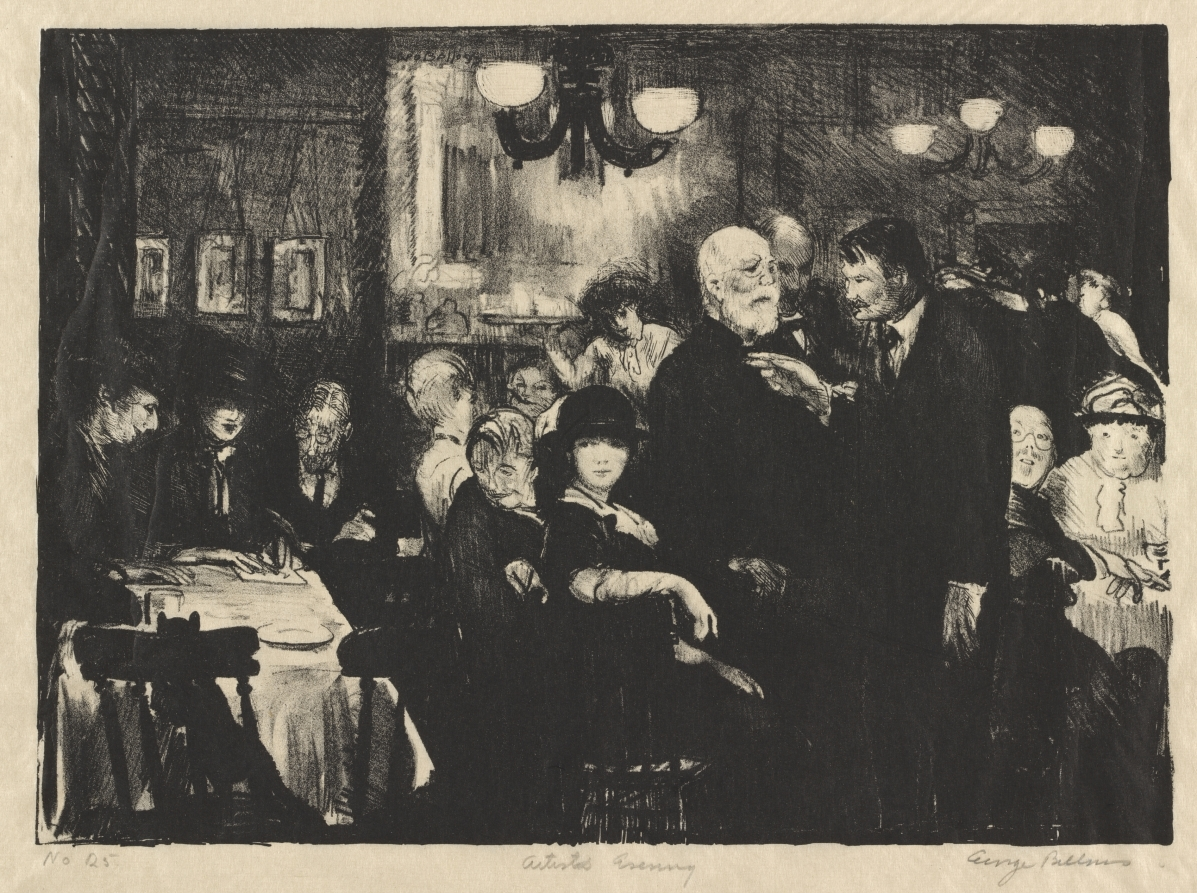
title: Artists Evening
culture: America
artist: George Bellows (American, 1882–1925)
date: 1916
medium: lithograph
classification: Print